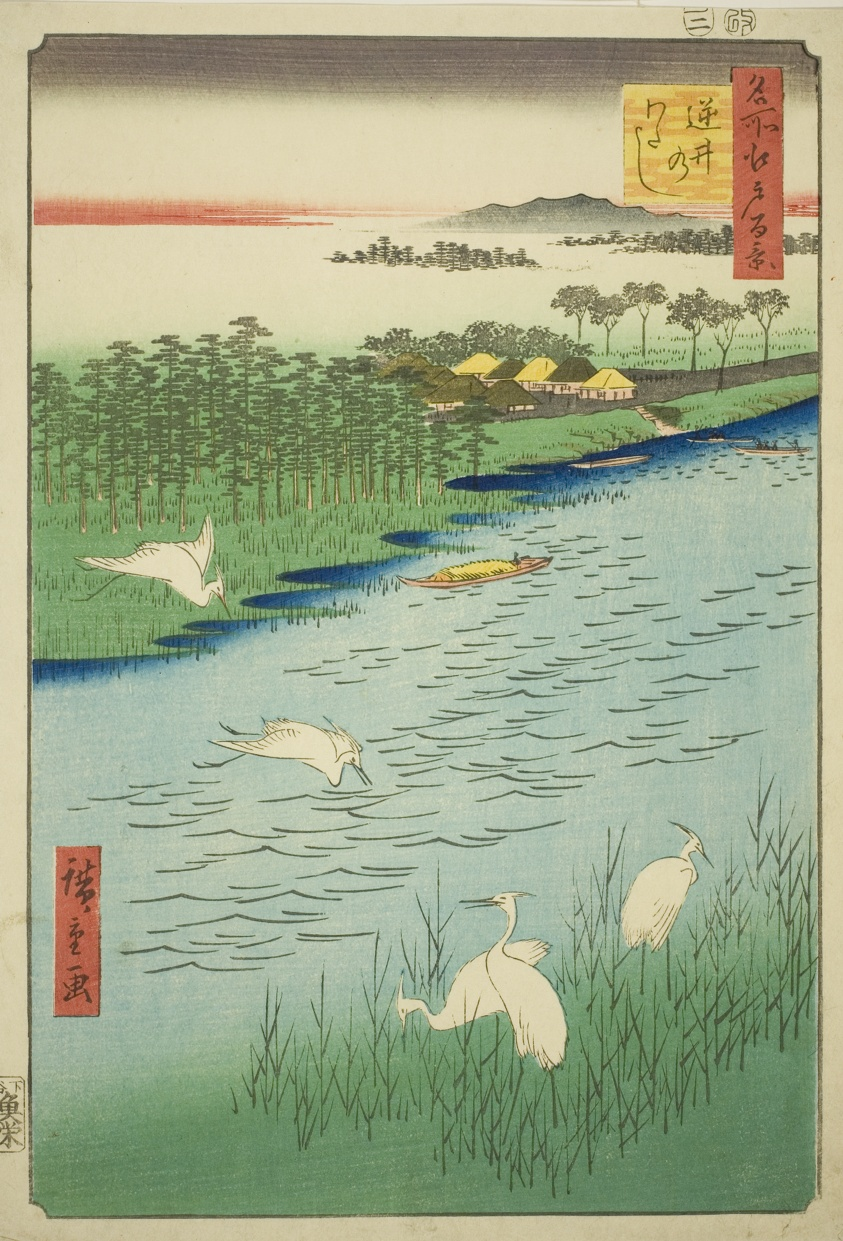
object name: Print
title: Ferry Crossing at Sakasai (Sakasai no watashi), from the series "One Hundred Famous Views of Edo (Meisho Edo hyakkei)"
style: Japanese (culture or style)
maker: Utagawa Hiroshige 歌川 広重; Japanese, 1797-1858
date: 1857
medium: Color woodblock print; oban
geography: Japan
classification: woodblock print; print; asian art